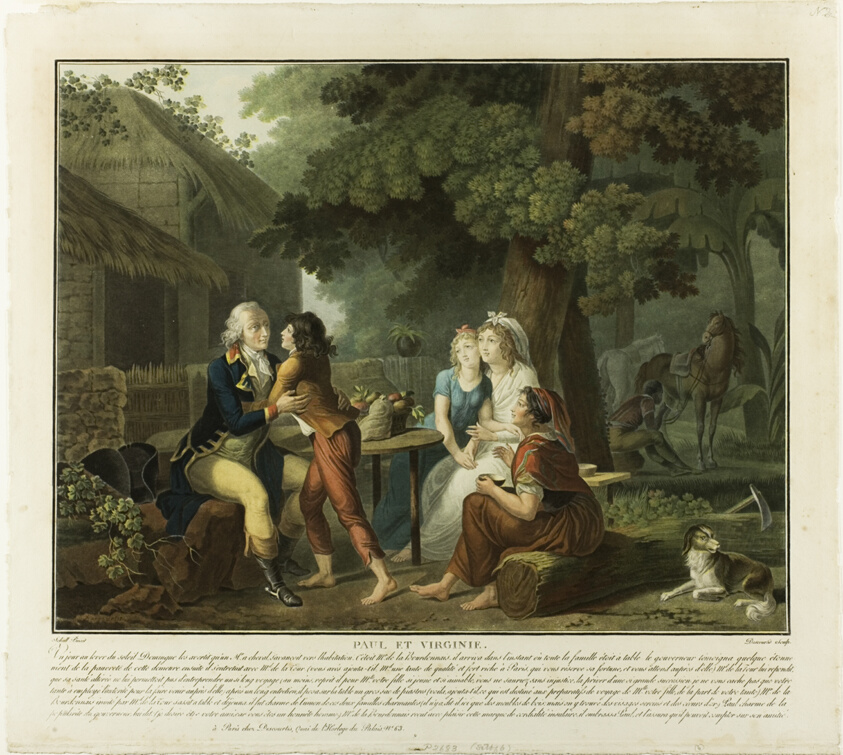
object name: Print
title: The Arrival of Monsieur de la Bourdonnais, plate 3 from Paul et Virginie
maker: Charles-Melchior Descourtis (French, 1753-1820); after Jean Frédéric Schall (French, 1752-1825)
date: 1795-97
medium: Etching and engraving printed in yellow, blue, red, and black inks on paper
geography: France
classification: etching; print; prints and drawing